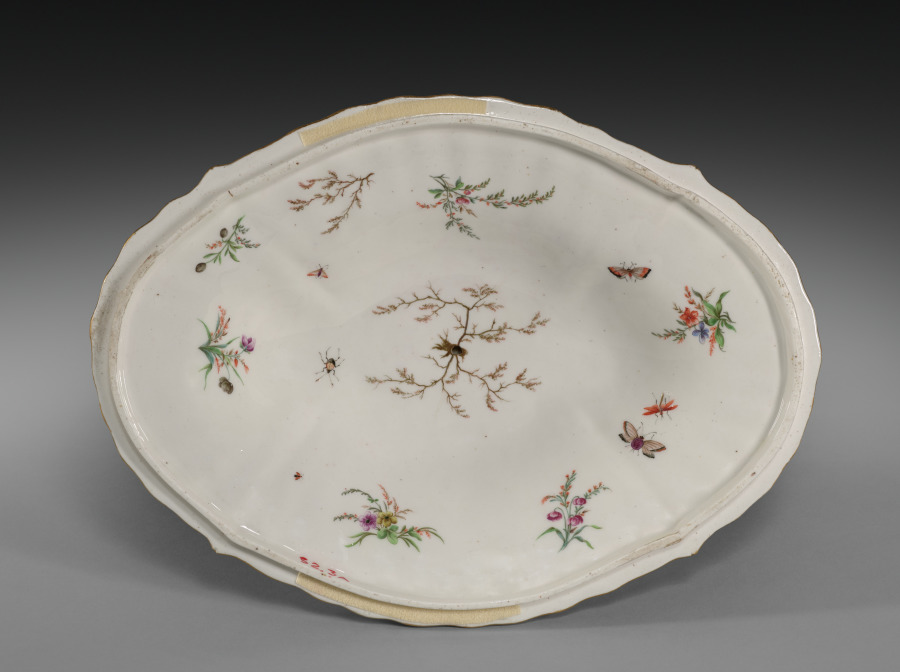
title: Cover for a Tureen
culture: France, Vincennes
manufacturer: Vincennes Porcelain Factory (France, 1740–56)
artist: probably painted by Louis-Denis Armand (French, active c. 1745–1783)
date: c. 1752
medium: soft-paste porcelain wth enamel and gilt decoraion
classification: Ceramic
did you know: This object was manufactured in soft-paste porcelain, a material used by many European porcelain factories before they were able to emulate the hard-paste porcelain of China and Japan.